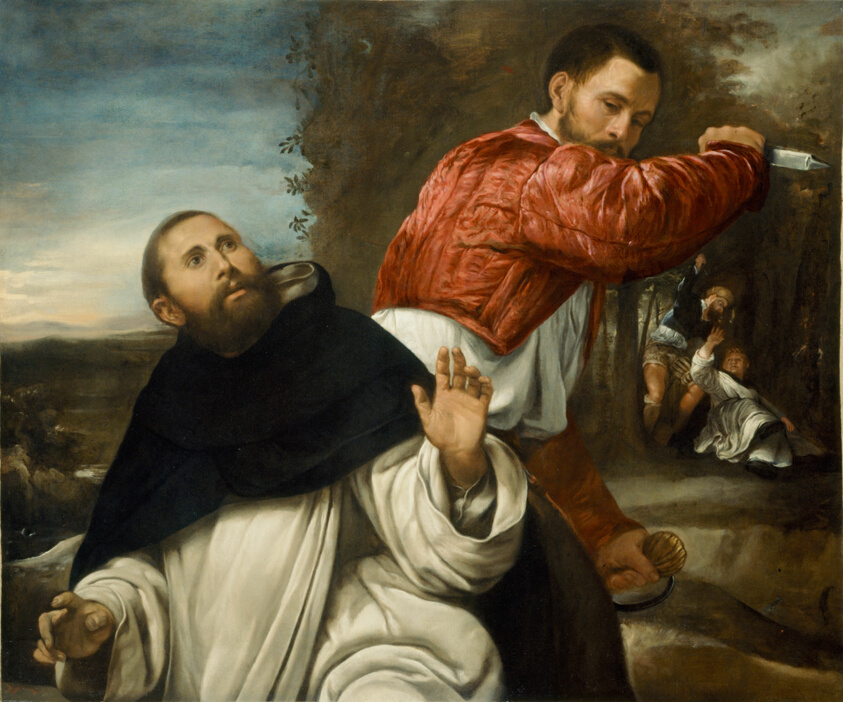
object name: Painting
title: The Death of St. Peter Martyr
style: sixteenth century, 16th Century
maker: Giovanni Girolamo Savoldo (Italian, active 1506–1548)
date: 1530/35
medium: Oil on canvas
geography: Italy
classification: oil on canvas; paint; oil paintings (visual works); Italian; painting; european painting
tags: saints, martyrs, death, violence, men, red (color), religion, religious, religious attire, religious figures, Christian subjects, Christianity, nature, landscape, knife, foliage, trees, paths, rocks